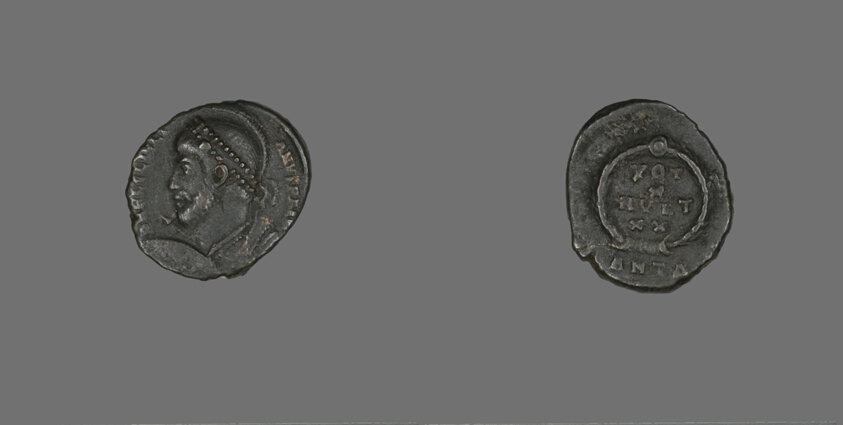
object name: Coin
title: Coin Portraying Emperor Julian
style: roman (ancient, style or period), ancient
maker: Roman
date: 360-363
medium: Bronze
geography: Roman Empire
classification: coin; ancient art